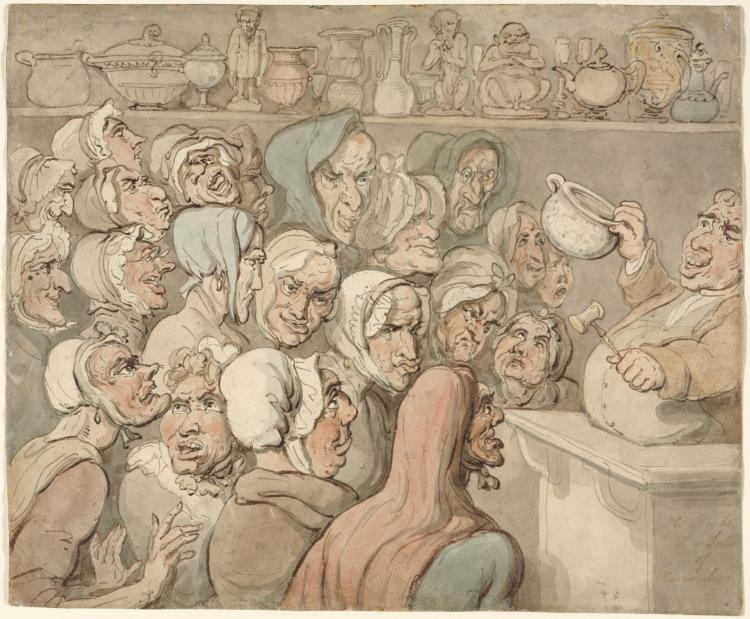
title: Old Maids at a Sale of Curiosities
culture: England, 18th century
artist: Thomas Rowlandson (British, 1756–1827)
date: c. 1776–1827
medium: pen and brown and gray ink and watercolor wash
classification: Drawing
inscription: Inscribed in watercolor, lower right: "Old Maids/at a Sale/of/Curiosities"